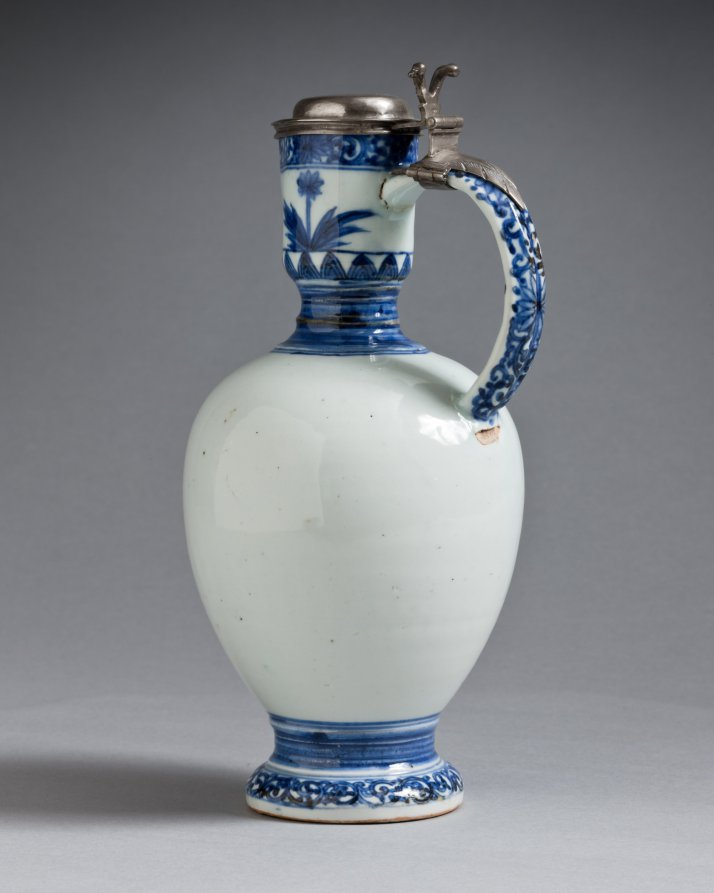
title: Jug with Silver Mounts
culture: Japan, Edo period (1615–1868)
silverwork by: Barent van Leeuwen (Dutch, 1637–1682)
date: c. 1662–76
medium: porcelain with underglaze blue decoration and silver mounts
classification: Ceramic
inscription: [on silver]: town mark for Amsterdam; lion rampant crowned (alloy mark for 0-934 silver); d (date letter for 1666), maker's mark of Barent van Leeuwen.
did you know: The coat of arms on this jug are those of the Valckenier family, active in the Dutch East India Company.